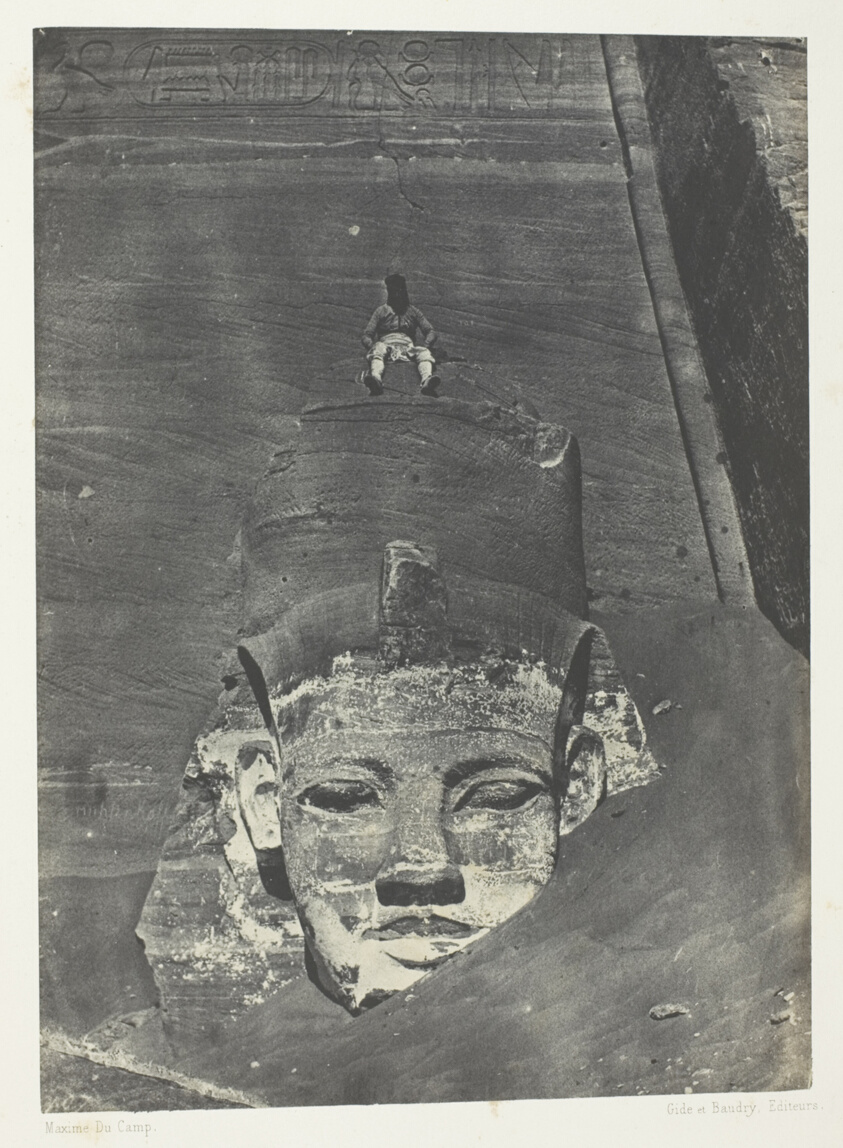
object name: Photograph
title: Ibsamboul, Colosse Occidental Du Spéos De Phrè; Nubie, plate 107 from the album "Egypte, Nubie, Palestine et Syrie" (1852)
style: 19th century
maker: Maxime Du Camp (French, 1822–1894)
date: 1849/51, printed 1852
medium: Salted paper print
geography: France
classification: salted paper print; photographic process; photography; photograph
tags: Collected by Hugh Edwards, Egypte, Nubie, Palestine et Syrie